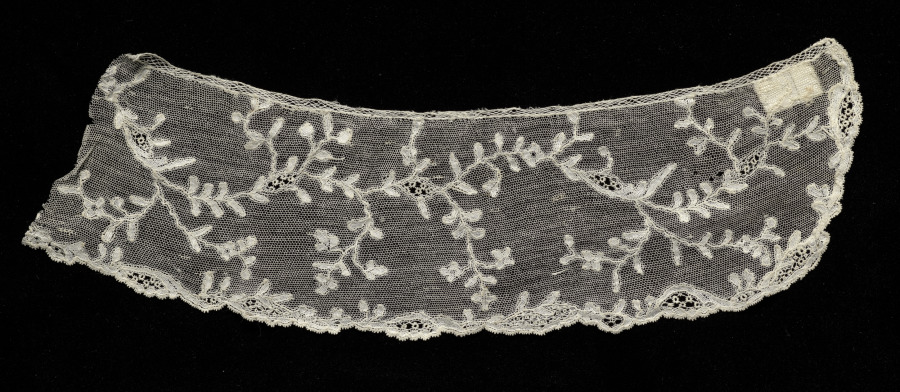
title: Fragment of a Lace Collar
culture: Italy, Burano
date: 1700s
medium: Linen: needle lace (Burano Point)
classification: Lace